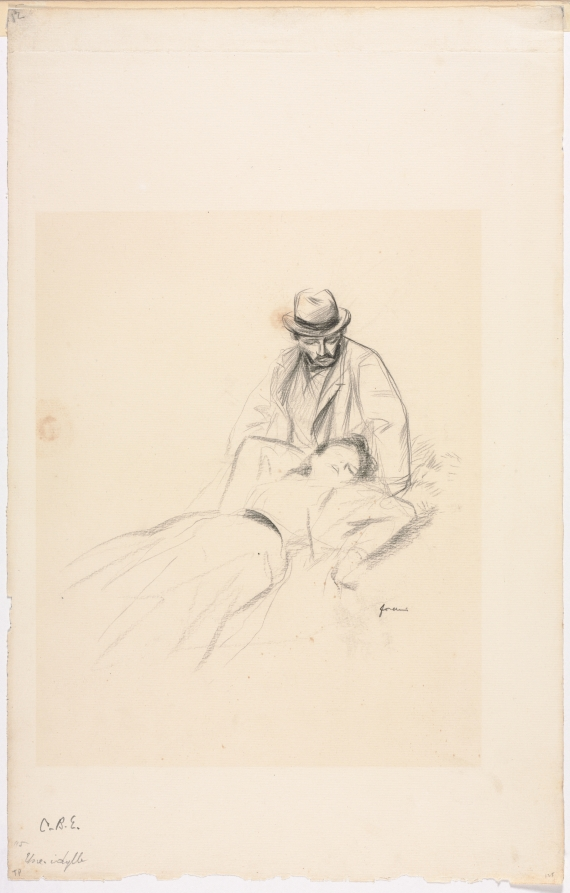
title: An Idyll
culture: France, late 19th-early 20th Century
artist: Jean Louis Forain (French, 1852–1931)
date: fourth quarter 1800s or first third 1900s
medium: black crayon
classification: Drawing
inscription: signed lower right, in black crayon: forain ; upper left, in graphite: 12 ; lower left, in graphite: C.B.E. ; lower left, in graphite: 115 ; lower left, in graphite: Une-idylle ; lower left, in graphite: TP ; lower right, in graphite: 125 ; VERSO, lower right, in graphite: Idylle ; lower right, in graphite: [illegible] [cropped along torn lower edge] ; lower right, in graphite: 28 + 44 ; lower right, in graphite: [xee ?]